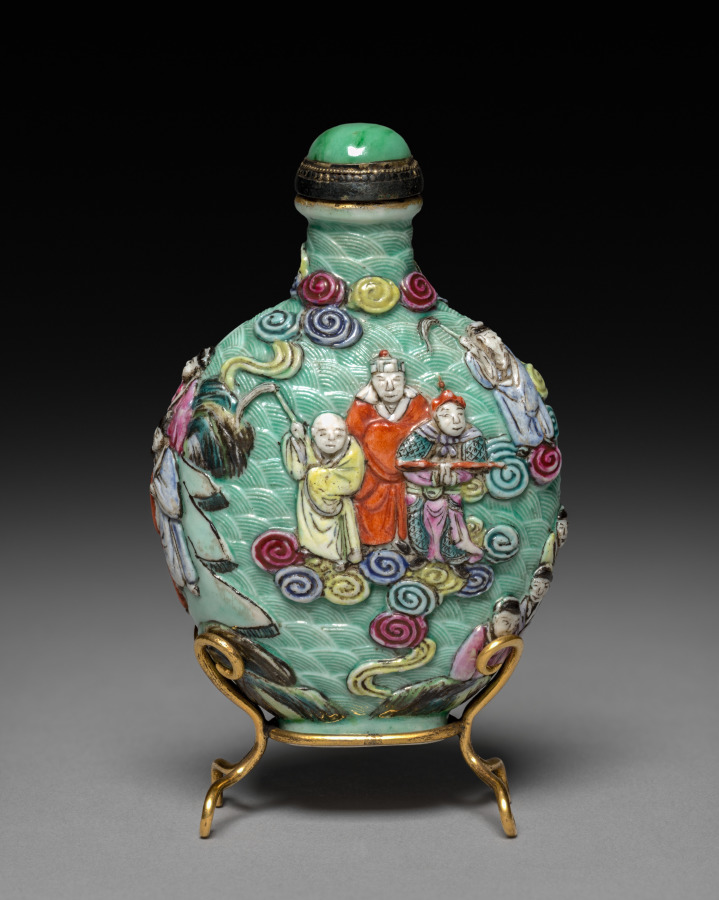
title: Flattened Ovoid Snuff Bottle with Stopper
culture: China, Qing dynasty (1644-1911), Jiaqing reign (1796-1820)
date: 1796–1820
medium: porcelain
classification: Ceramic